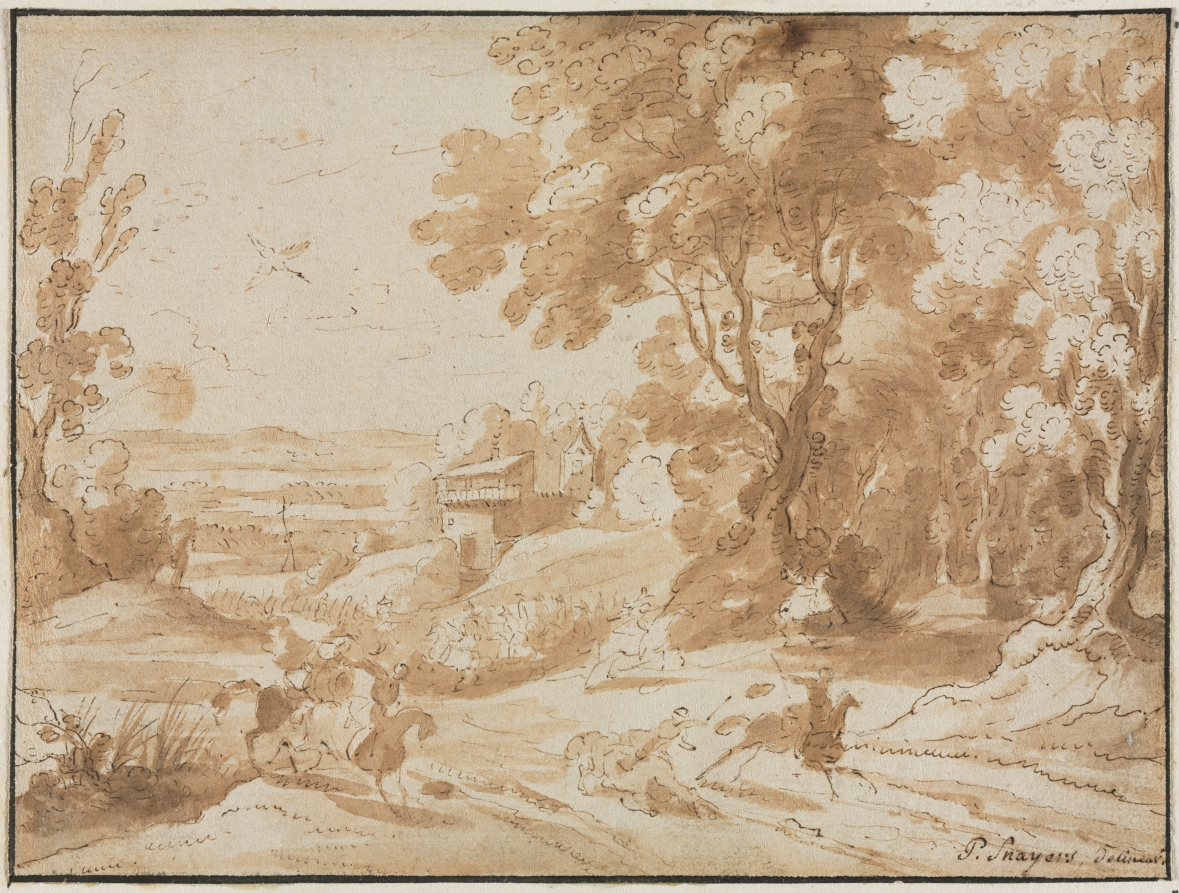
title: Landscape with Horsemen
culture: Flanders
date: 1600s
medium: pen and brown ink and brush and brown wash over traces of graphite; framing lines in black ink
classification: Drawing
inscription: lower right, in brown ink: P. Snayers. delineav.